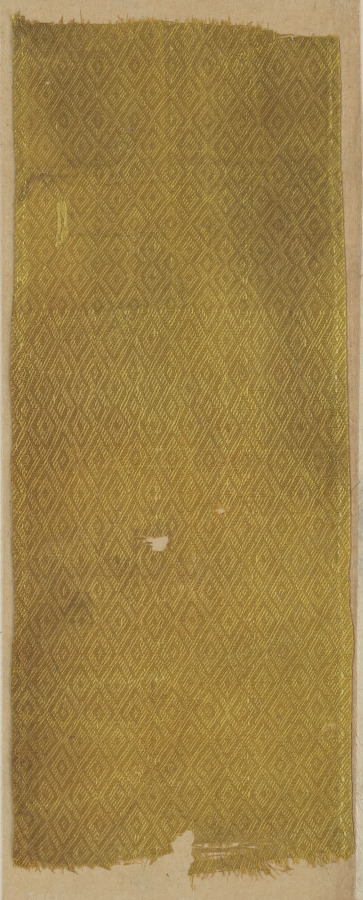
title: Fragment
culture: China, 8th century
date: 700s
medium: plain cloth, twill patterned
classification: Textile